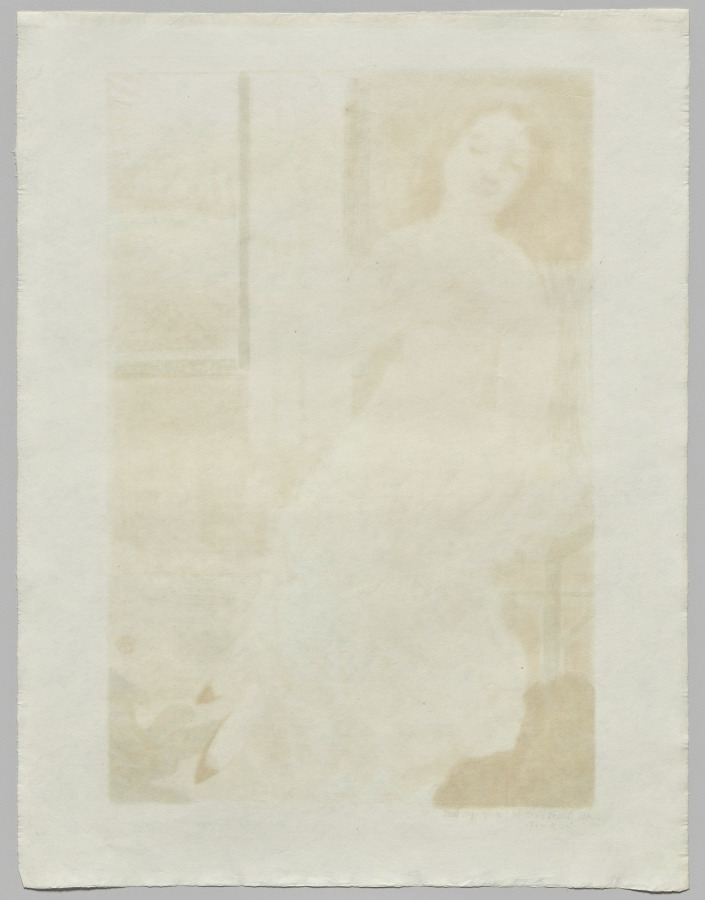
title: But It Is the Heart that Beats Too Fast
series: Love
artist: Maurice Denis (French, 1870–1943)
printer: August Clot (French, 1858–1936)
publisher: Ambroise Vollard (French, 1867–1939)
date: 1899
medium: color lithograph on wove paper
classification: Print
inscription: Recto, lower left: “XII Mais c’est le couer qui [illegible]/trop vite”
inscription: In graphite, recto, lower right: “Maurice Denis (signed)”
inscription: In graphite, recto, lower left: “[illegible number]”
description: Maurice Denis belonged to the Nabis, a group of artists who came together in 1889 to pursue a radical new style informed by subjective experience and emotion. This print is from a series in which Denis explored his devotion to his wife, Marthe, by depicting her in a variety of settings alongside titles drawn from his own journal. The vague but evocative images were meant to encourage the viewer to draw connections to the theme and meditate on its meaning.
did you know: Maurice Denis was a devout Catholic and often drew visual connections between his wife, Marthe, the subject of this print series, and the Virgin Mary.